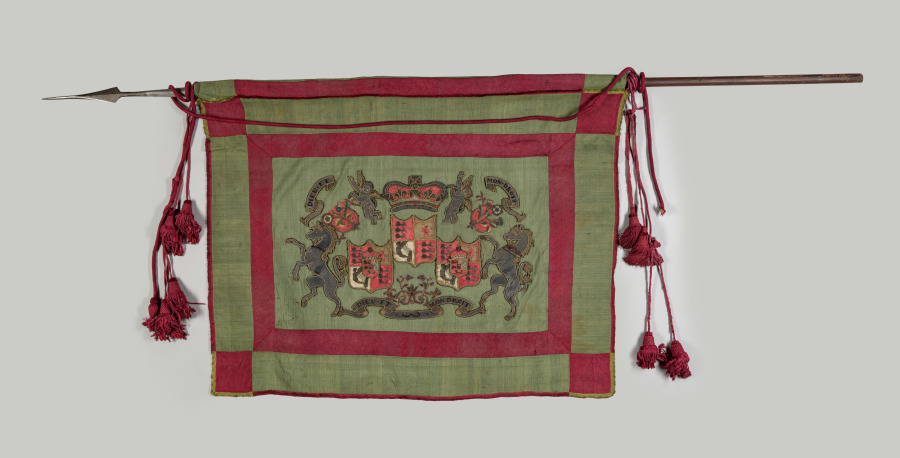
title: Banner with Royal Coat of Arms of Great Britain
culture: Great Britain, probably England, 18th century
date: 1700s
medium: green silk ground with embroidery; crimson cords and tassels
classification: Textile